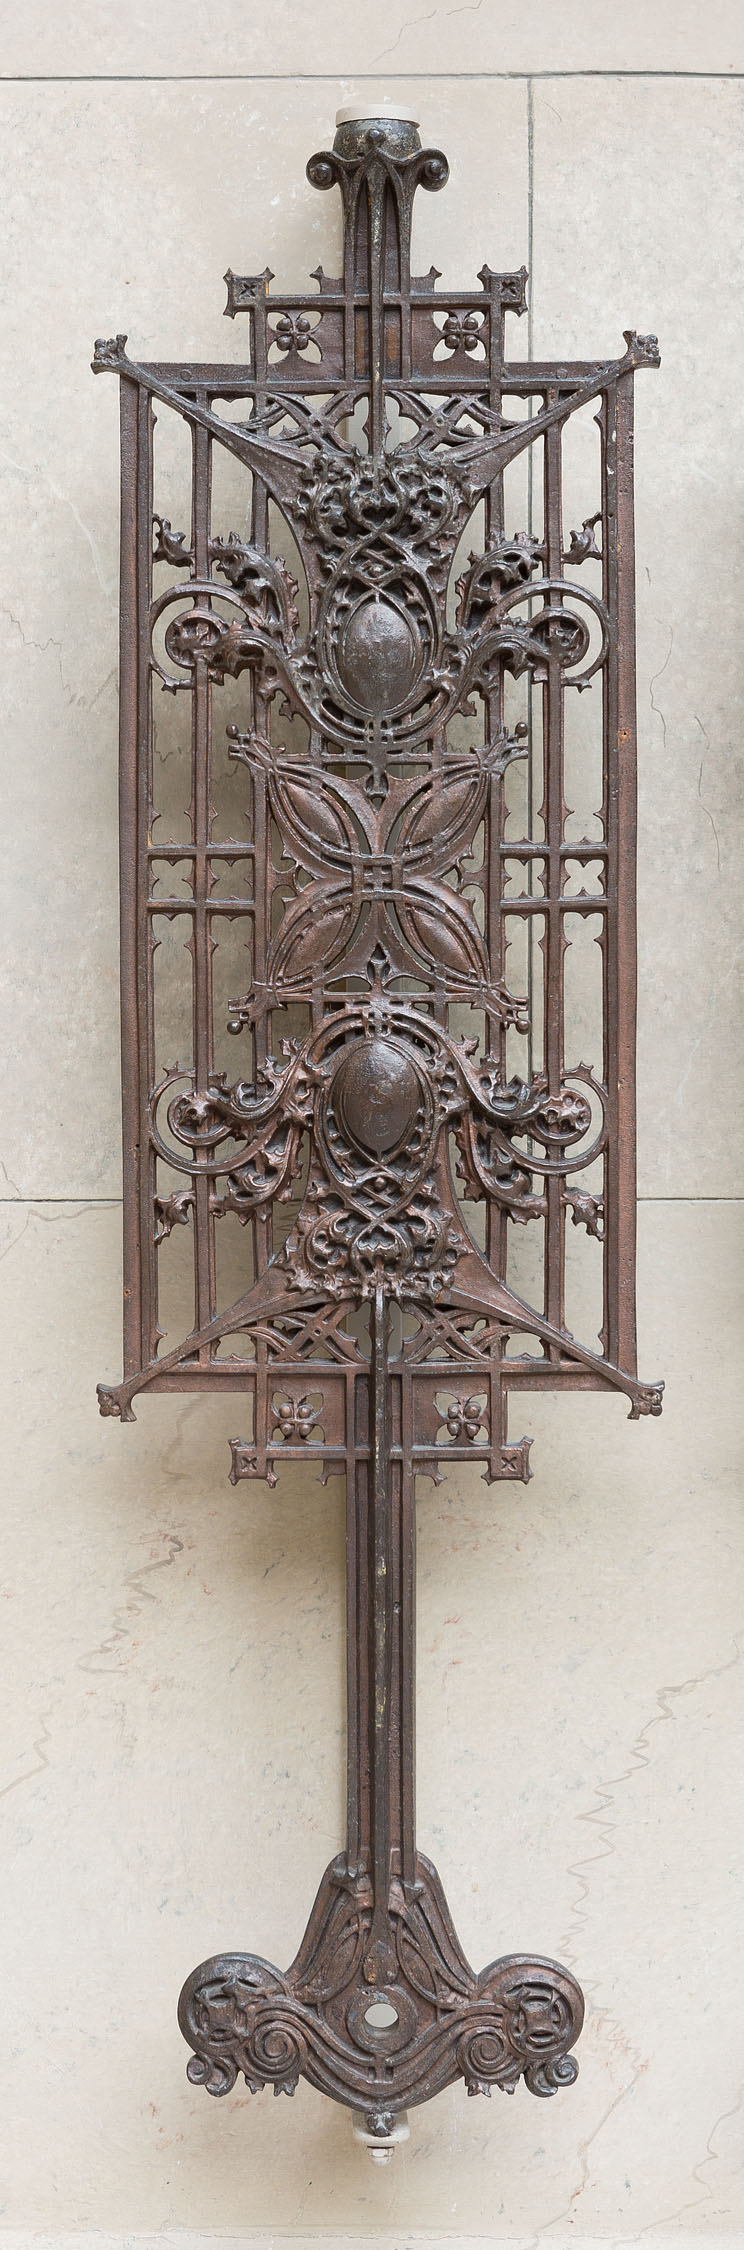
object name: Architectural fragment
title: Schlesinger and Mayer Company Store, Chicago, Illinois, Baluster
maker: Louis H. Sullivan (American, 1856–1924)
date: 1898–1899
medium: Copper plated iron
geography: United States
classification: copper plate; architectural fragment